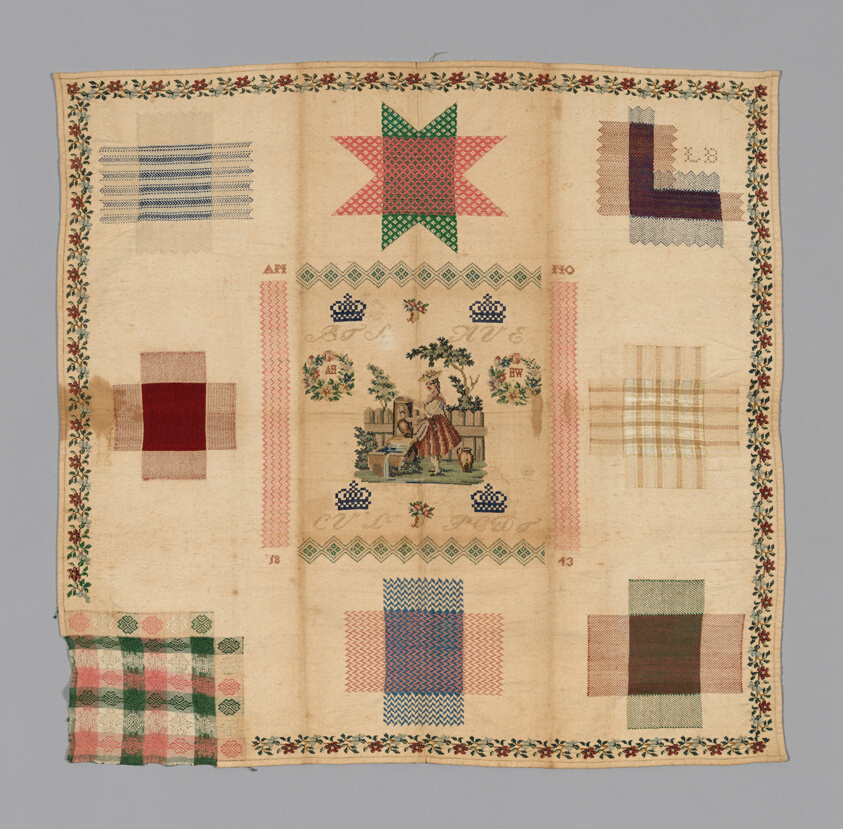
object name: Textile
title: Darning Sampler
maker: Netherlands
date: 1843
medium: Embroidered in multicolored silks on canvas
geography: Netherlands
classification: textile; needlework (visual works)